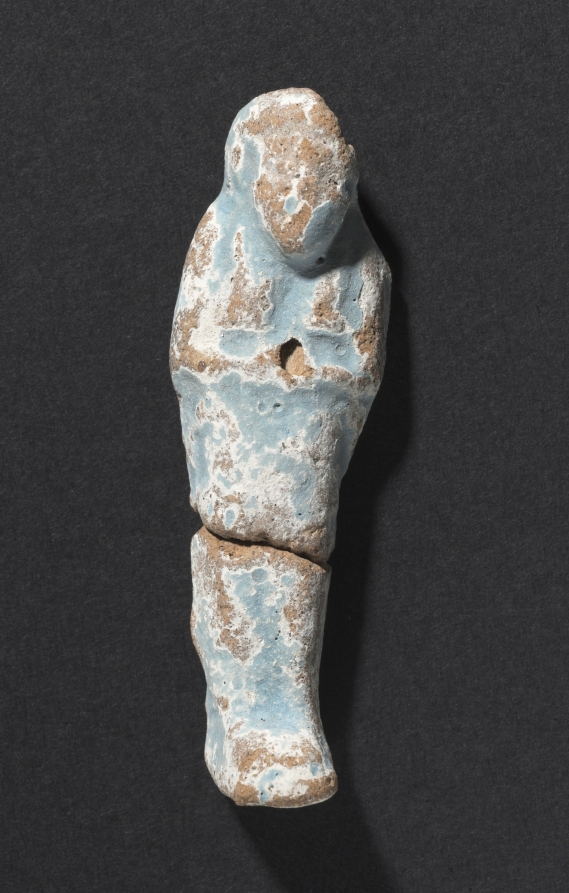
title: Shawabty of Ditamenpaankh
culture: Egypt, Late period (715–332 BCE), Dynasty 25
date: 715–656 BCE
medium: terracotta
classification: Funerary Equipment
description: High demand for shawabtys in the Late Period, a time when as many as 400 or more shawabtys were placed in the tomb with the deceased, gave rise to a specialized container for storing them: the shawabty box. This example is inscribed for the lady of the house, Ditamenpaankh, and was probably one of a pair originally made for her. The single-masted boat on the box's lid is perhaps an allusion to the pilgrimage of the deceased to the holy city of Abydos, the cult city of Osiris, king of the dead. The shawabtys inside are crude, mass-produced examples cast in an open mold. Made of terracotta, their blue paint imitates more costly shawabtys made of faience. As for the shawabty spell, it has been removed from its traditional location on the shawabty's front and relocated onto the sides of box, where it needed only to be written once, thus expediting production.